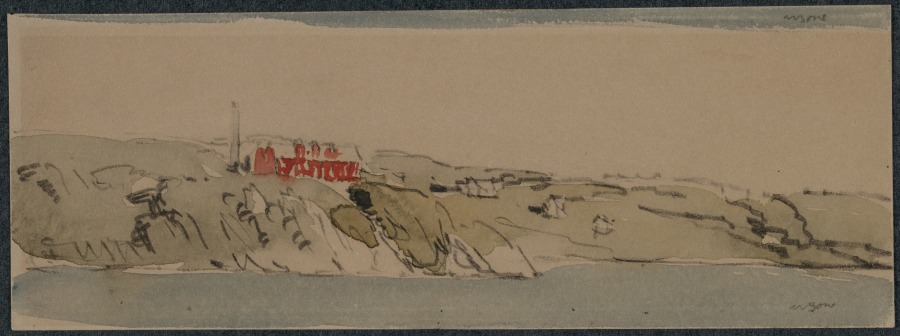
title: Entering Bergen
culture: England, 20th century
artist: Muirhead Bone (British, 1876–1953)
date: c. 1896–1953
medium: watercolor and graphite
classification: Drawing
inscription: Lower right and upper right, in graphite: M. Bone